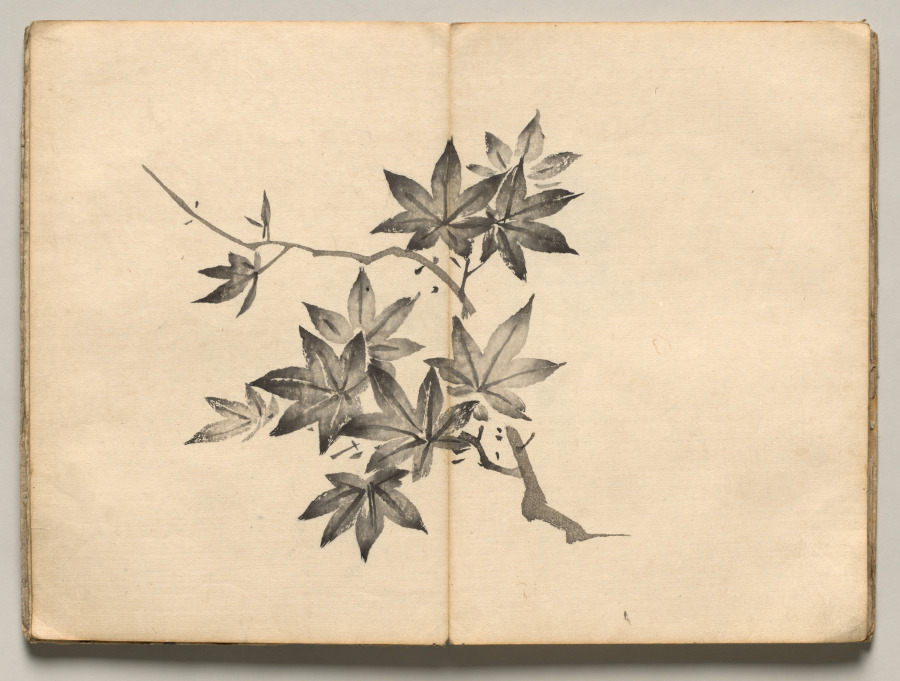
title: Maple from Ōkyo Picture Book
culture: Japan, Edo period (1615–1868)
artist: after Maruyama Ōkyo (Japanese, 1733–1795)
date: 1850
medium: accordion-style woodblock printed folding-book; ink and color on paper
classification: Bound Volume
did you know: This impression of a book of woodblock-printed designs is missing a spread that depicts a crane.